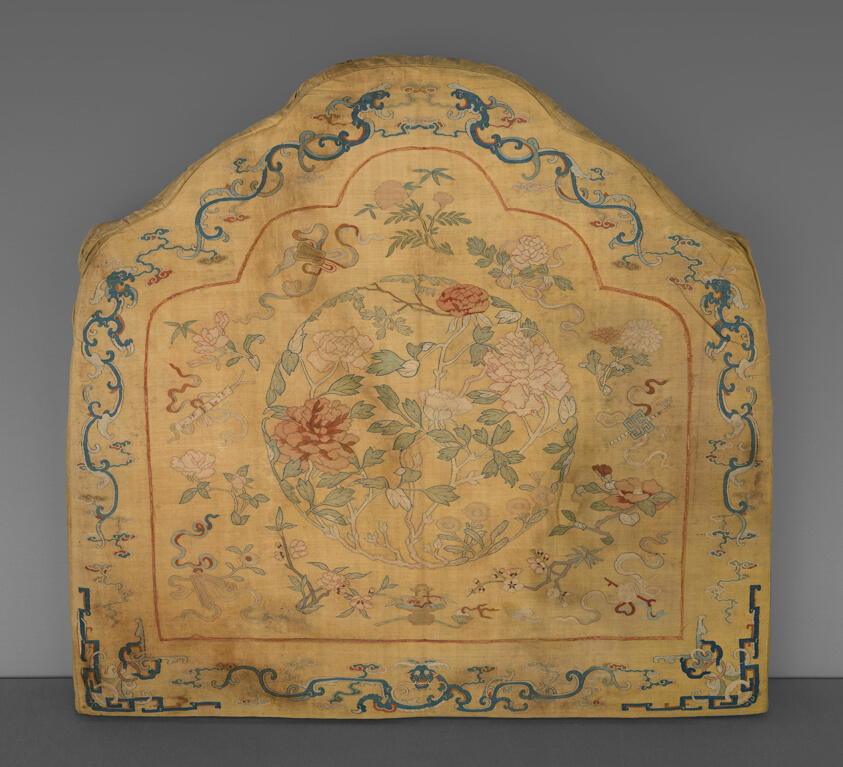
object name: Textile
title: Chair Cover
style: qing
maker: China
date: Qing dynasty (1644–1911), 1750/1800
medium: Yellow ground with floral motifs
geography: China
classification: textile; weaving